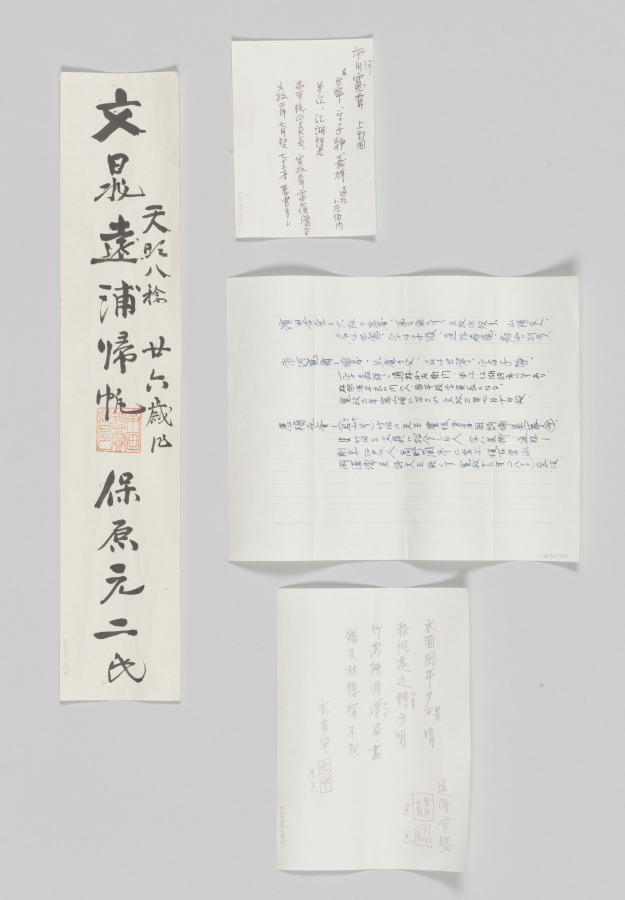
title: Returning Sails off a Distant Shores, from Eight Views of Xiao-Xiang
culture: Japan, Edo period (1615–1868)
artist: Tani Bunchō (Japanese, 1763–1841)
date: 1788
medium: album leaf remounted as a hanging scroll; ink and color on paper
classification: Painting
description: This painting was part of a set of album leaves representing the Eight Views of Xiao-Xiang, a theme originating in Chinese poetry and painting that spread to both Korea and Japan. Southern China’s Xiao-Xiang area, where the mist-covered banks of the Xiang River created a complex landscape shifting like the moods and minds of people, captured the imaginations of generations of painters and calligraphers. Inscriptions on these works suggest that they were possibly ordered by newly prominent Japanese Confucian scholars.